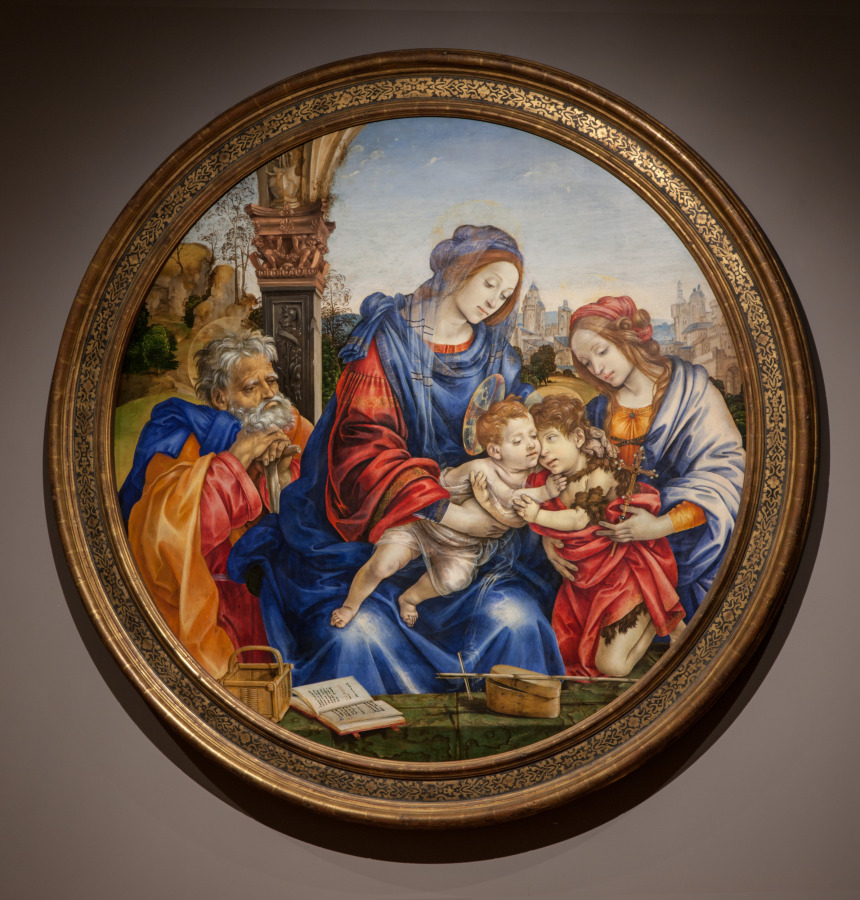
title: The Holy Family with Saint John the Baptist and Saint Margaret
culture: Italy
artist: Filippino Lippi (Italian, c. 1457–1504)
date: c. 1488–93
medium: tempera and oil on wood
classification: Painting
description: This monumental tondo, among Filippino’s most significant works, was commissioned by Neapolitan cardinal Oliviero Carafa, a leading political and ecclesiastical figure. The painter’s ingenious composition harmoniously overlaps five brilliantly colored divine figures within the challenging circular format. Behind a low wall adorned with sacred and domestic objects, Joseph observes the intertwined group of Mary holding Christ, who embraces his cousin John the Baptist, supported by Saint Margaret. Created during Filippino’s Roman years (1488–93), the painting reflects the inspiration he drew from ancient art. The preparatory drawing reveals how he reimagined Greco-Roman figures—his sketch of an antique Venus statue was refashioned into Saint Margaret—while the weathered pier references remnants of ancient architectural and decorative motifs, illustrating Filippino’s deep engagement with the fragments of antique murals, sculpture, and architecture throughout the city.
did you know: Ultramarine, the blue pigment used lavishly across this tondo (circular painting), was many times more expensive than gold in the Renaissance.